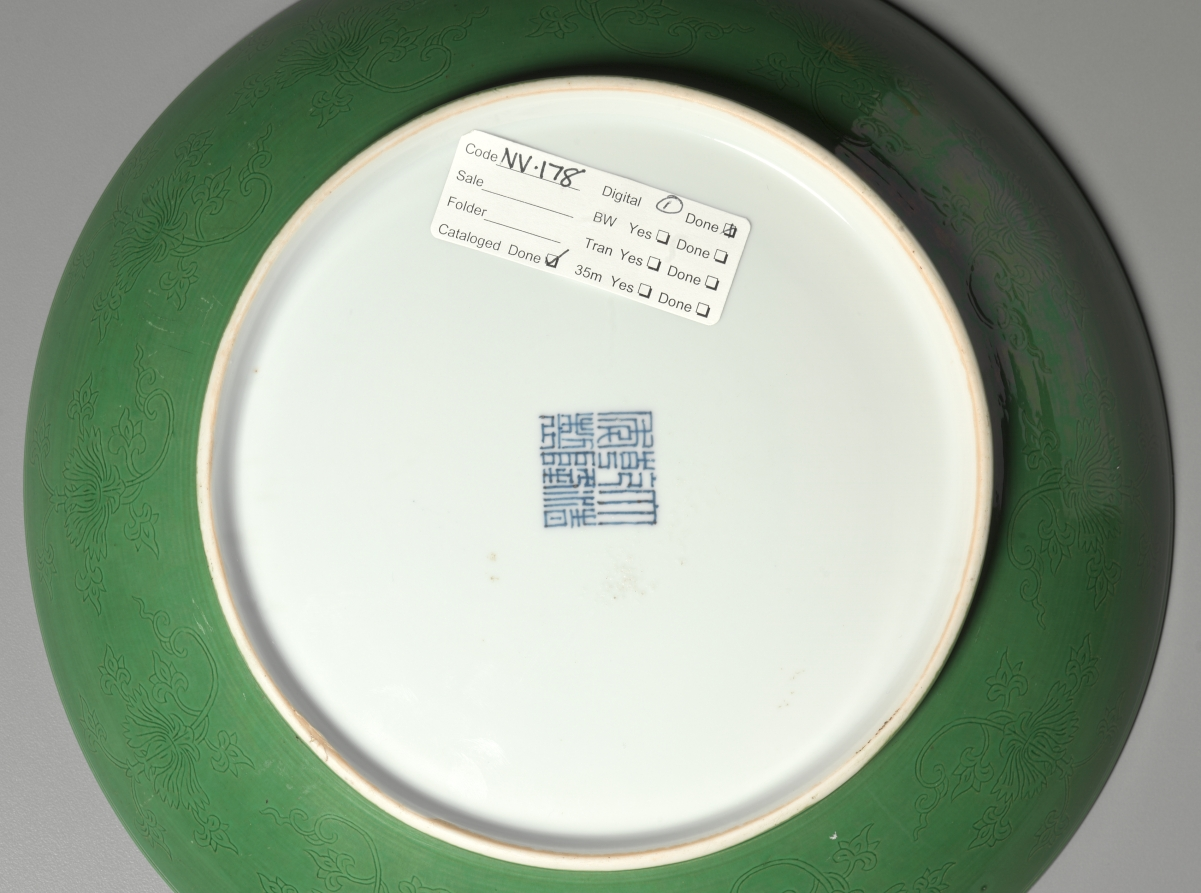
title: Dish with Green Glaze and Carved Floral Designs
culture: China, Qing dynasty (1644-1911), Qianlong mark and reign (1735-1795)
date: 1736–95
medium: glazed porcelain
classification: Ceramic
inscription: 大清乾隆年制